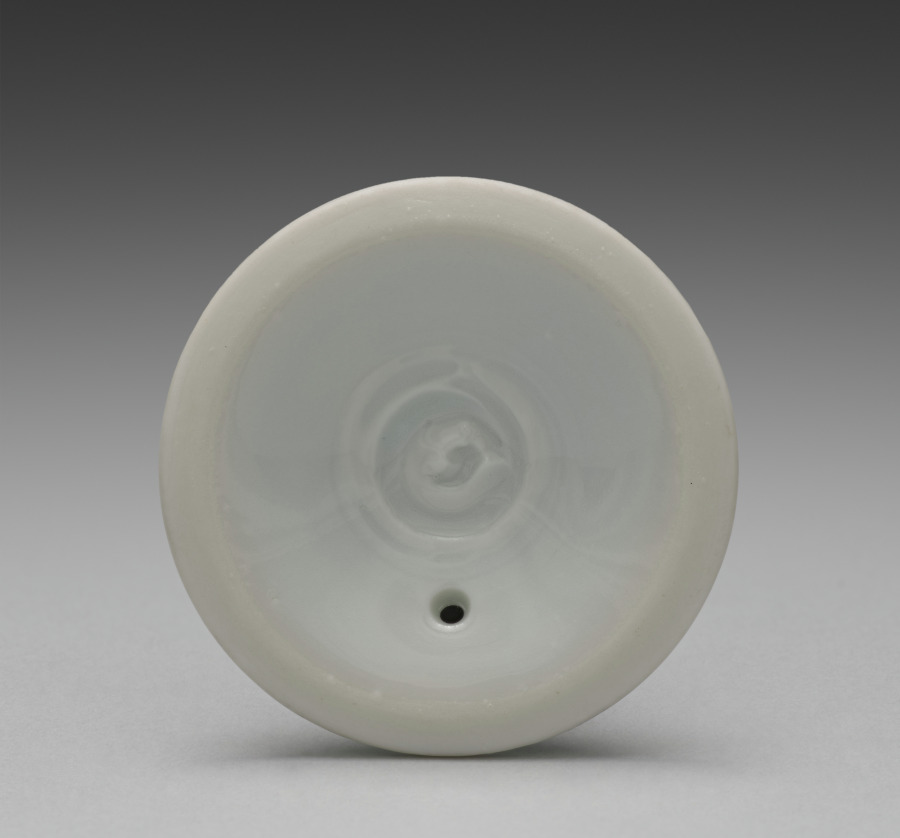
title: Lid for a Teapot with Cherry Blossoms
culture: Japan, Taishō period (1912–26) or Shōwa period (1926–89)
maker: Seifū Yohei IV (Japanese, 1872–1951)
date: 1914–46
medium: Porcelain with underglaze blue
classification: Ceramic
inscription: 清風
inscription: 清風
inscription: 清風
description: This teapot with mountain cherry blossom motifs has its design in underglaze cobalt blue. It runs over both the pear-shaped body and the recessed lid. There is a faint bluish-green tint to the glaze. The mark impressed into the base of this work appears to be one used by Yohei III. However, the box inscription is brushed in a hand matching that of Yohei IV, and while the seal on the lid is one often used by Yohei III, that next to the signature on the back of the lid is one generally used by Yohei IV. The signature, too, resembles others belonging to Yohei IV. As the design, technique, and object named on the box accurately describe the contents, it seems unlikely, but not impossible, that it is mismatched. There are many cases in which Yohei III works are contained in boxes with inscriptions, seals, and a signature by Yohei IV. However, in such examples, Yohei IV clearly identifies himself as authenticating the work of his father and often includes his father’s Imperial Household Artist seal. This may be an example of a transitional piece in which Yohei IV has used his father’s mark on the base of his own work.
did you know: The lid has a pointed, jewel-shaped handle.